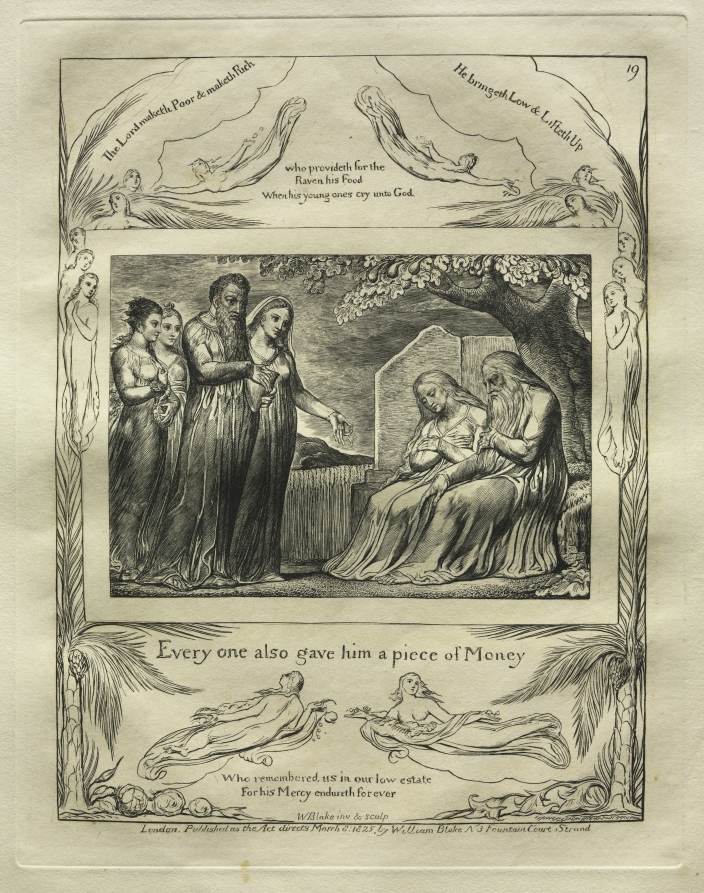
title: The Book of Job: Pl. 19, Every one also gave him a piece of Money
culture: England, 19th century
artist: William Blake (British, 1757–1827)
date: 1825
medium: engraving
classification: Print